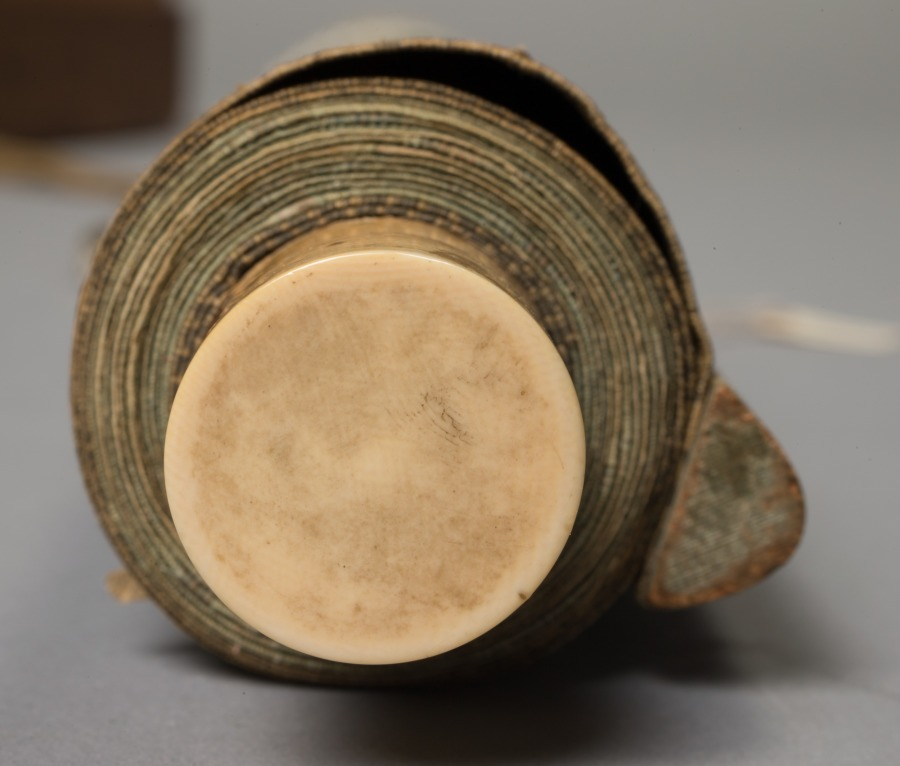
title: Bamboo in Wind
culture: Japan, Muromachi period (1392–1573)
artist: attributed to Genga (Japanese)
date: early 1500s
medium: hanging scroll; ink on silk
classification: Painting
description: East Asian paintings from China, Korea, and Japan were frequently conceived as sets of multiple images. These sets might have been composed for specific palace or temple rooms, or to portray a specific theme, such as the four seasons. Over time, the original intent of such sets is often lost through damage, changes in ownership, or a variety of other reasons. The identity of the artist can also be lost, but then, sometimes, retrieved. This pair of ink paintings has traditionally been labeled as Japanese and attributed to the 16th-century painter Genga. Since there are no seals or signature of the artist on the painting, this attribution was based on comparisons of brush style with paintings known to be by Genga. More recent study indicates that while the 16th century is an appropriate time frame for the pair, the precise cultural identity of the artist is not certain after all. The dark, eccentric shapes of the rocks and bamboo clusters and the dramatic tonal contrasts evident throughout the composition point to either Korean authorship or influence upon a Japanese painter of the period.